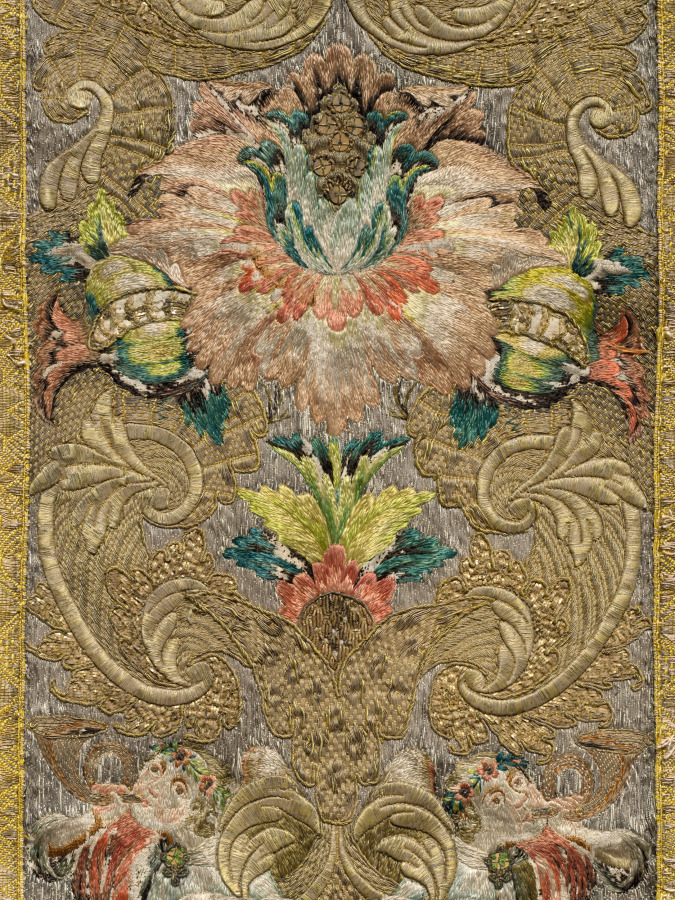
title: Chasuble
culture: Germany, Bavaria, last quarter of 17th century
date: 1675–99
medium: Silk and metallic threads on silk tabby sewn down on a linen tabby ground; embroidery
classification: Embroidery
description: This rare chasuble decorated with angels, musicians, pomegranates, and flowers represents Sacred and Profane Love. This is indicated by two figures—a clear-sighted figure embracing a blindfolded figure—standing on a globe in the upper center and also by the musicians. The angels play soft-sounding instruments (harpsichords, harps, viole da barccio, and flutes) while earthy figures play loud instruments (tambours and hunting horns). The chasuble was most likely part of a liturgical set commissioned for a wedding. This entire chasuble is embroidered with silk and metal thread laid over linen and stitched in place. The exceptionally fine workmanship, lavish use of gold and silver, and brilliant silk thread create this sumptuous vestment.